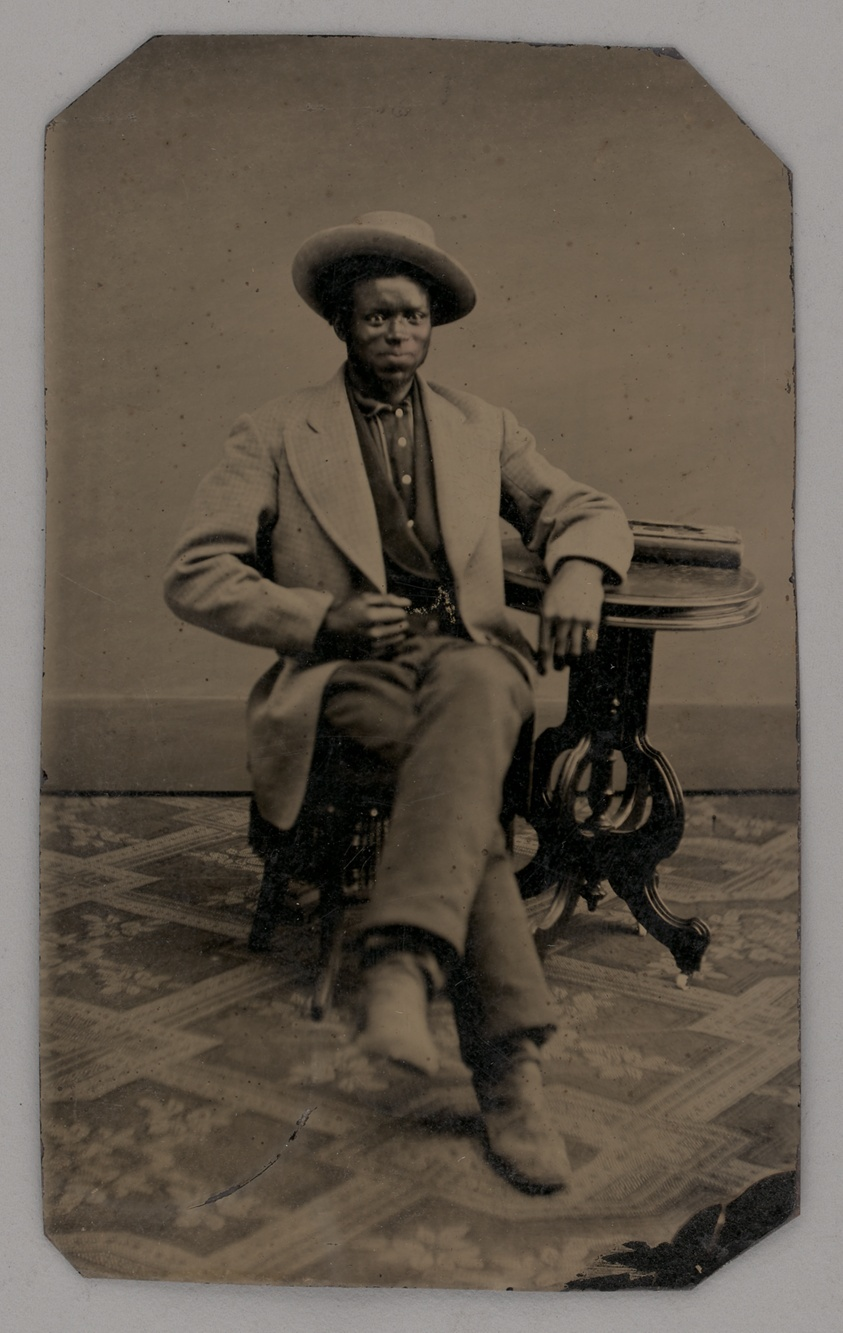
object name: Photograph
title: Untitled (Portrait of a Seated Man)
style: 19th century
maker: Unknown maker; American, 19th century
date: 1880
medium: Tintype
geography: United States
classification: portrait; tintype; photograph; photographic process; photography; portrait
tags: portraits: African American subject, Male, men, lundberg collection, African American, portraits, portraits: male subject, portrait